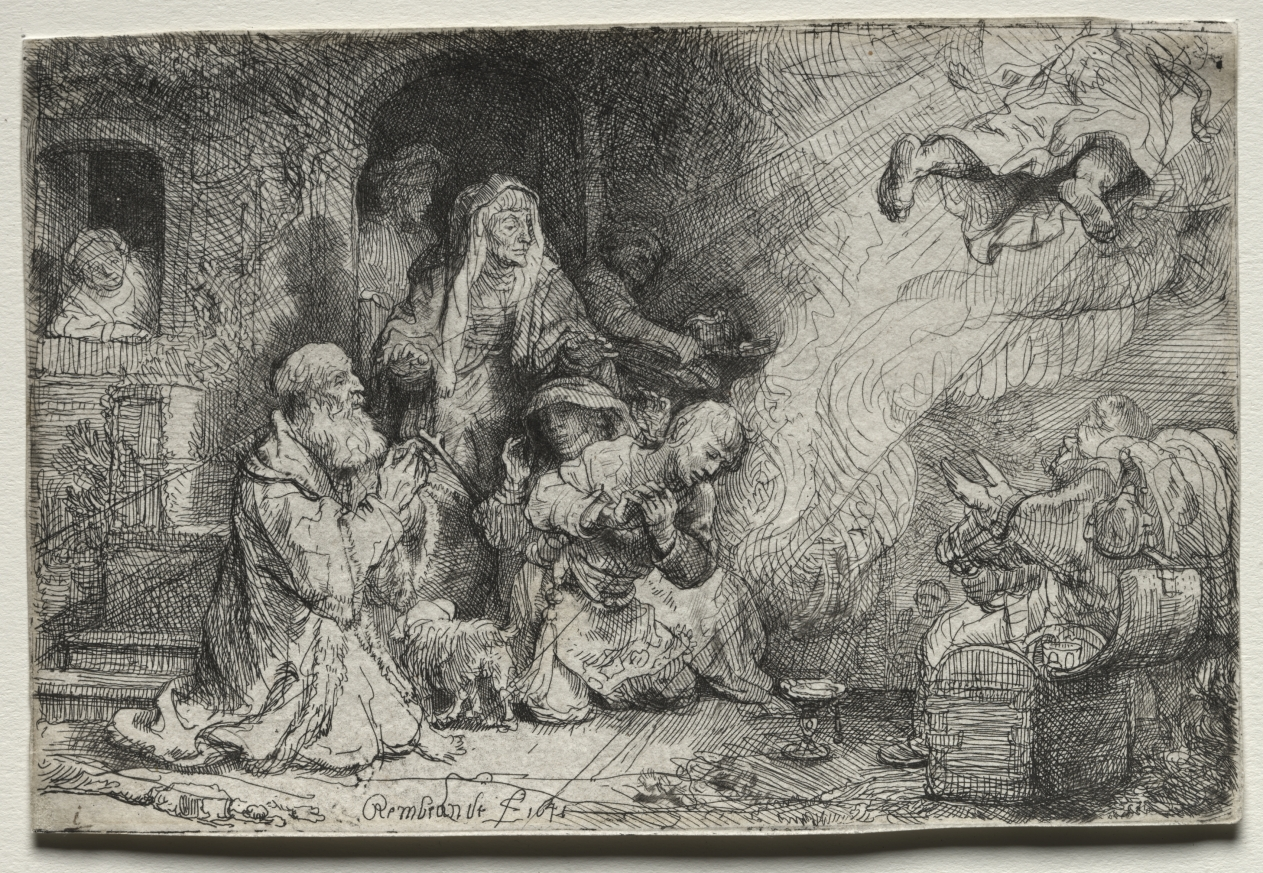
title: The Angel Departing from the Family of Tobit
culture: Netherlands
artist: Rembrandt van Rijn (Dutch, 1606–1669)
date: 1641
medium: etching and drypoint with granular bitten tone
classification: Print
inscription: lower left, in plate: Rembrandt f 1641 ; lower left, in pen and brown ink: i ; VERSO, upper center, in graphite: Nº 42 P. 25. ; lower left, in graphite: [illegible] ; lower center, in graphite: [illegible]